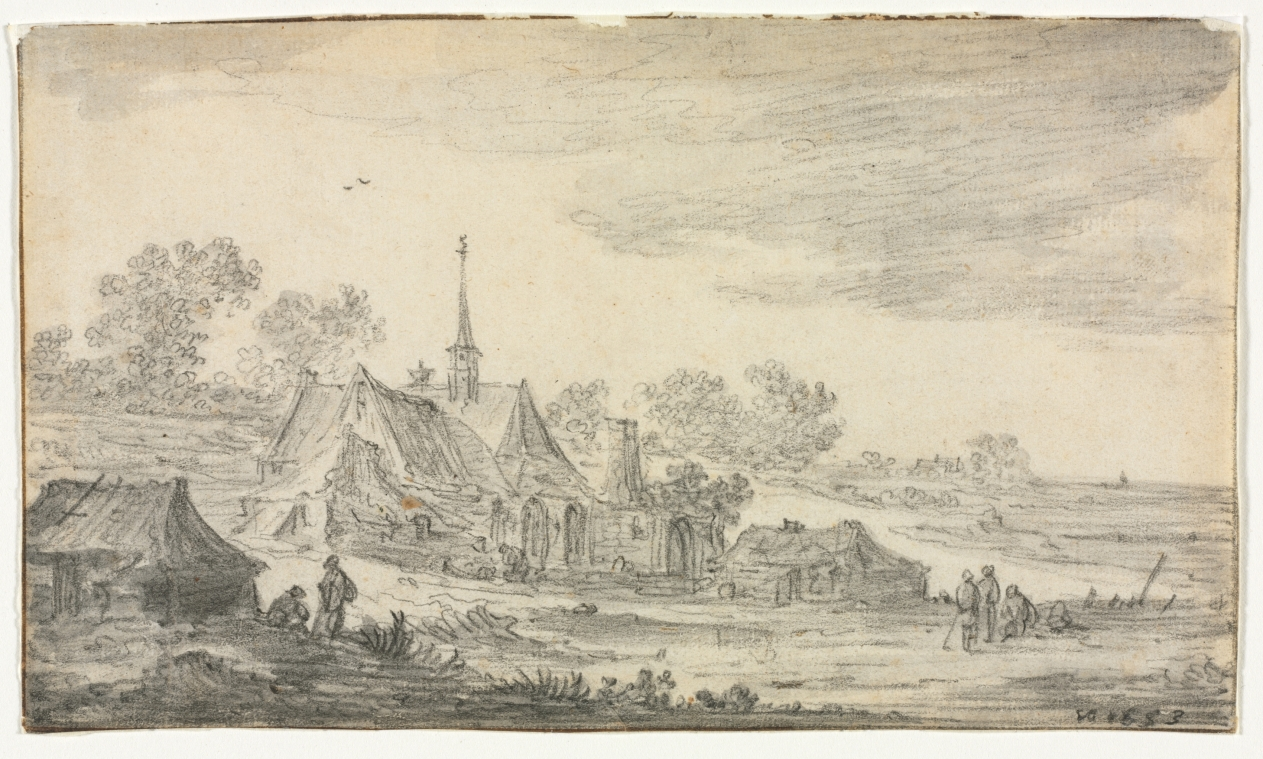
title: Group of Buildings on a Seashore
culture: Netherlands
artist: Jan van Goyen (Dutch, 1596–1656)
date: 1653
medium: black chalk and brush and gray wash; framing lines in brown ink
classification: Drawing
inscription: signed, lower right, in black chalk: [artist monogram: VG] 1653